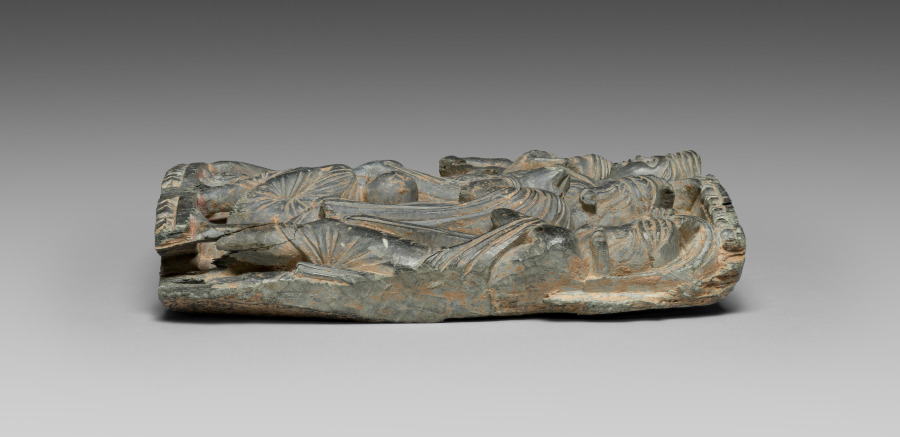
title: The Great Miracle at Shravasti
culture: Pakistan, Gandhara, Peshawar Valley, early Kushan period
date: c. 100 CE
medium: schist with traces of gold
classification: Sculpture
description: After the Buddha reached enlightenment, he spent the remainder of his life traveling around northeastern India, giving teachings and performing miracles in order to convert followers and establish the Buddhist community. One of his most famous miracles is when he levitated and caused fire to leap from his shoulders and water to flow from his feet. The figures of two monks kneel in worship. Others press their hands together in a sign of devotion and submission, while the figures on the outer edges whistle and shake their upper garments, as was customary when an amazing sight was seen.